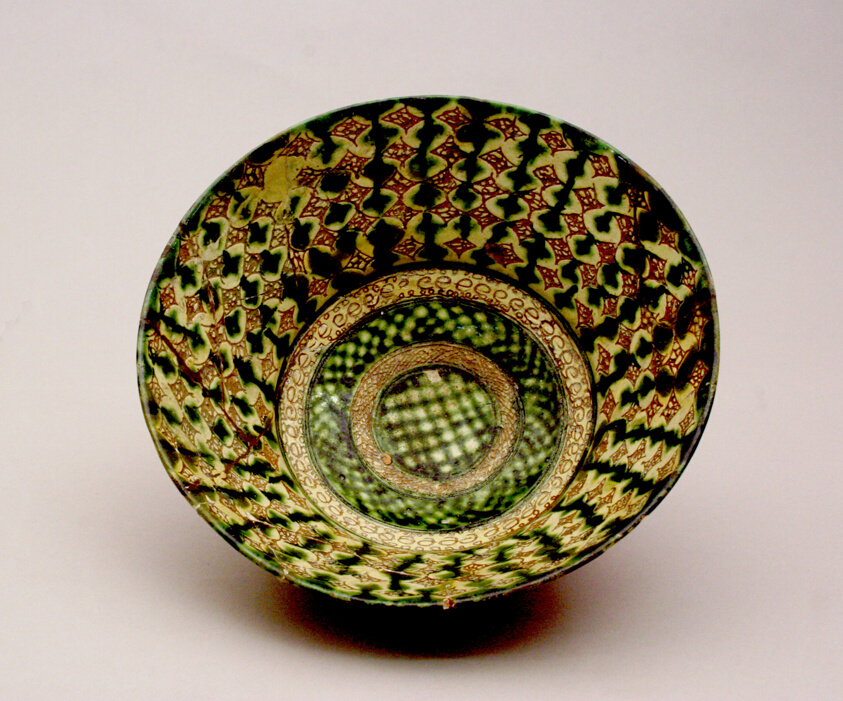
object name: Ceramics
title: Bowl with Incised Decoration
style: amol, abbasid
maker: Iran; Probably Amol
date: 11th/12th century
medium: Earthenware with incised decorations and polychrome painting under transparent glaze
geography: Iran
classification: ceramics; asian art; decorative arts